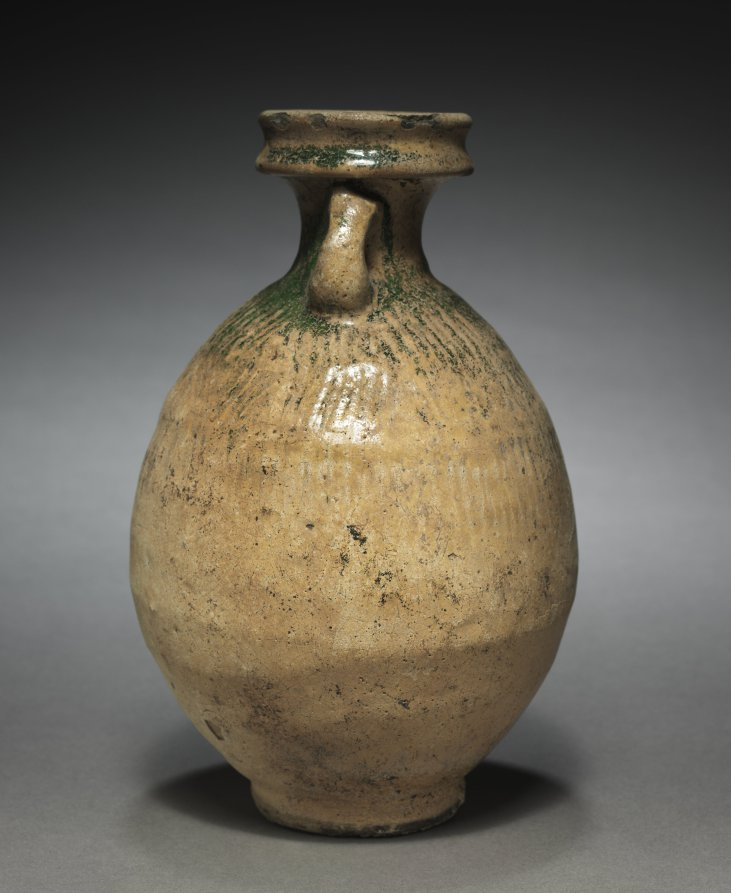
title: Ovoid Vase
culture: Parthian Empire (247 BCE–224 CE)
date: 1–200 CE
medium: terracotta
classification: Ceramic